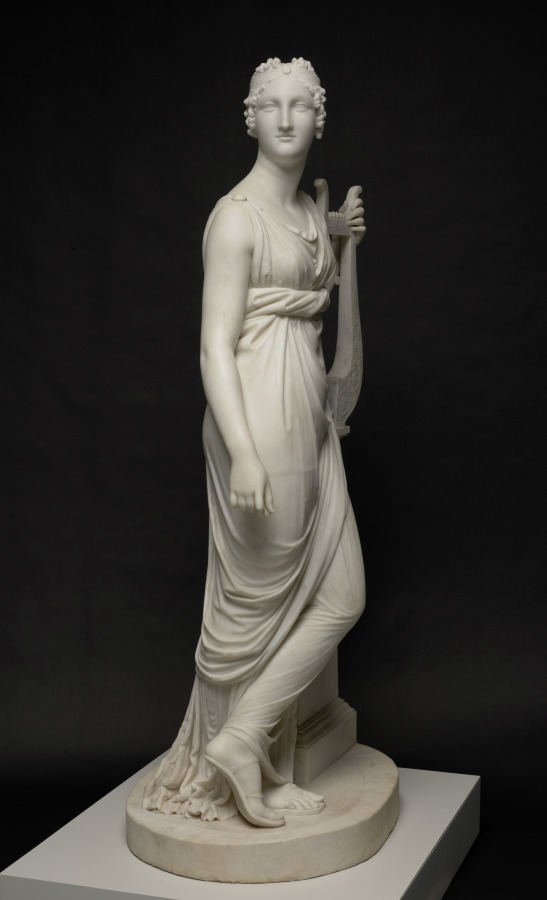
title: Terpsichore Lyran (Muse of Lyric Poetry)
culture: Italy, 19th century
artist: Antonio Canova (Italian, 1757–1822)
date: 1816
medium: marble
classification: Sculpture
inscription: inscribed on front of column: "Terpsichore Lyran" [Terpsichore as the Muse of lyric poetry]; inscribed at base of column: "Canova Fact: 1816"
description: In Greek mythology, Terpsichore was one of the nine Muses, or goddesses of creative inspiration. The lyre, the Greek inscription on the short column, and the caduceus (entwined snakes) on the side identify the figure as Terpsichore Lyran, muse of lyric poetry. This sculpture began with a commission from Napoleon's brother, Lucien, for an idealized portrait of his wife, Alexandrine. Antonio Canova made this version for a British aristocrat and exhibited it in 1817 at the Royal Academy in London to great acclaim.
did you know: Trained by his grandfather, an Italian stonemason, Canova began modeling clay and carving marble sculptures before age ten.